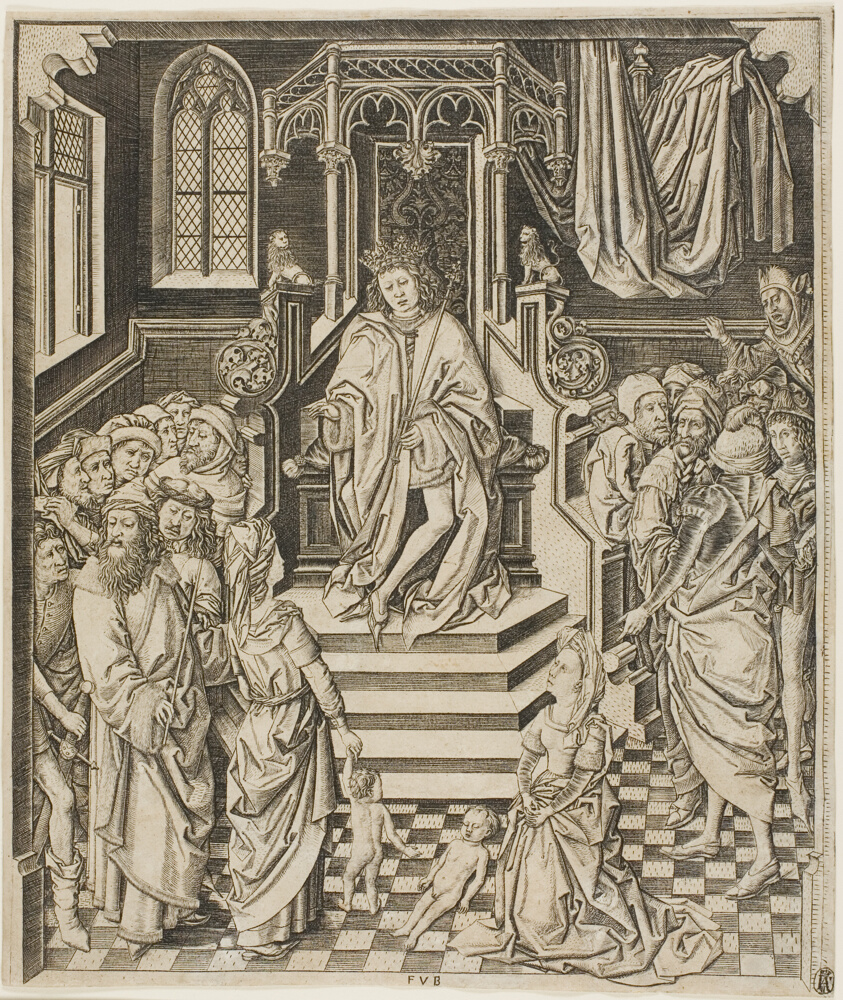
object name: Print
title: The Judgment of Solomon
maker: Unknown Artist; Netherlandish, 15th century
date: c. 1475–1500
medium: Engraving on paper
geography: Netherlands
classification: engraving; print; prints and drawing